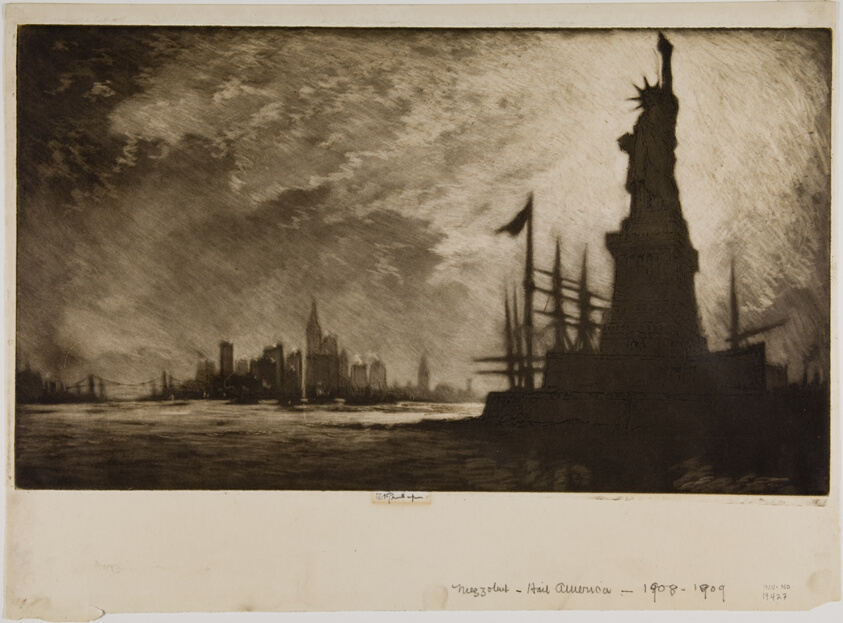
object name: Print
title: Hail America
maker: Joseph Pennell (American, 1857-1926)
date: 1908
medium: Mezzotint cream wove paper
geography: United States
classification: mezzotint; print; prints and drawing